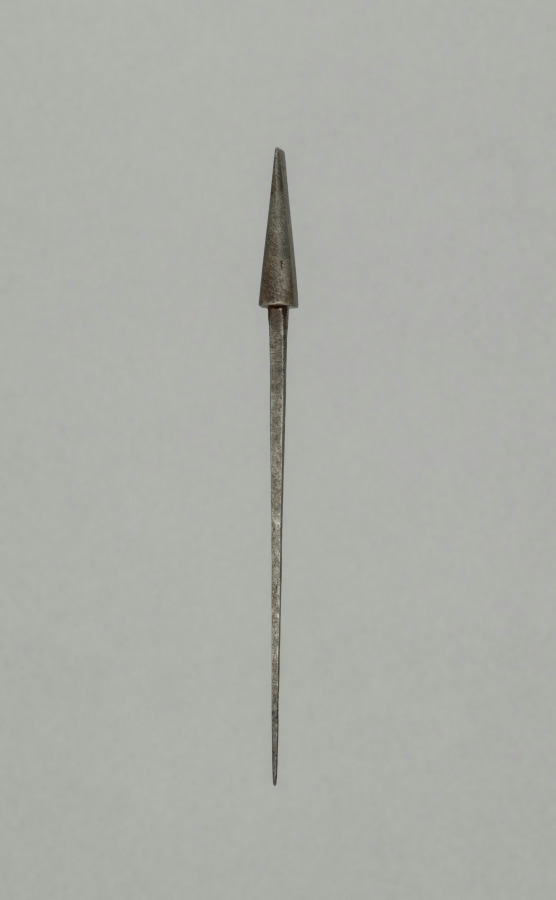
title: Arrow Point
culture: Japan, Edo period (1615–1868)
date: 1700s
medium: steel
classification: Arms and Armor